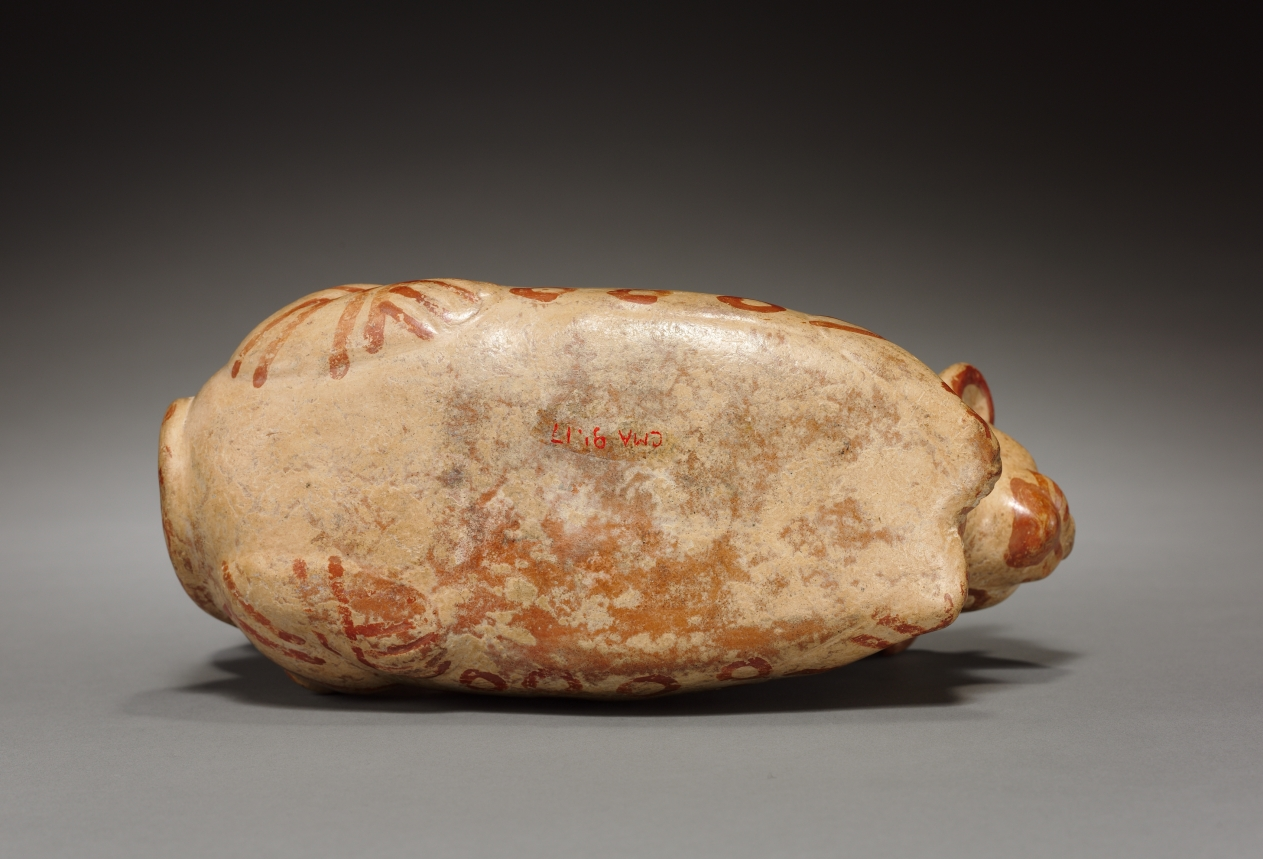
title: Stirrup Spouted Vessel of Feline Form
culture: Peru, Mochica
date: 1–1000 CE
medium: red earthenware decorated with cream-colored slip and brown pigment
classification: Ceramic